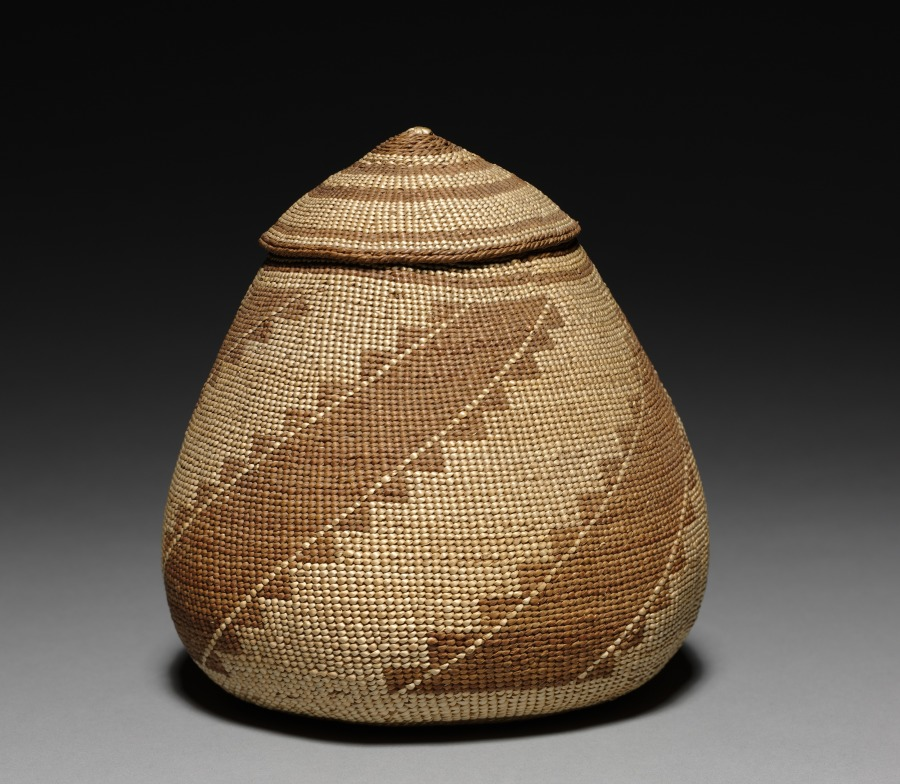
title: Tobacco Basket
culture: California, Yurok, late 19th century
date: c 1875– 1900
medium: twined grasses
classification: Basketry